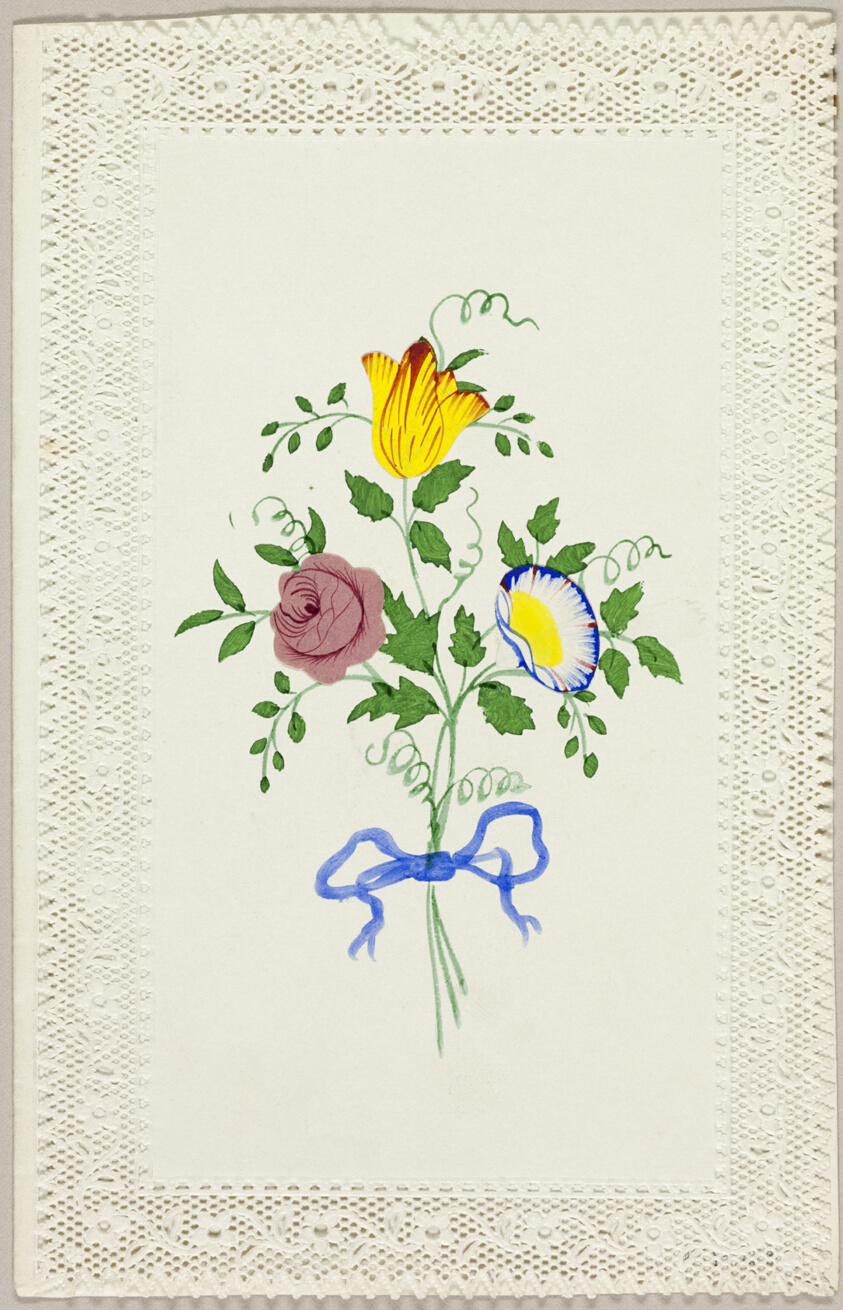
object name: Drawing and Watercolor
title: Untitled Valentine (Flowers)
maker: Unknown Artist; English, 19th century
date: c. 1840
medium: Watercolor and collaged elements on cut and embossed ivory wove paper (lace)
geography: England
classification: valentine; prints and drawing; paper